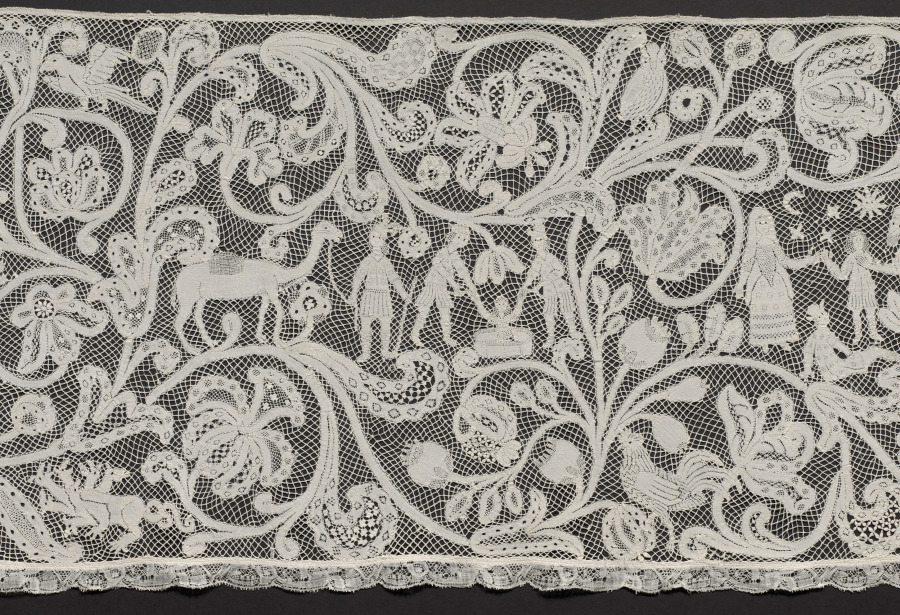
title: Lace Flounce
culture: Italy, Milan(?)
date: 1750–99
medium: Linen: bobbin lace (Punto di Milano)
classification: Lace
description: Being the most prestigious material, lace was used extensively by the 1600s for altar linen and for trimming priest’s albs, often incorporating finely rendered religious images amid blossoming vines. This alb flounce depicts scenes from the Old Testament story of Joseph, whose jealous brothers sold him to a caravan bound for Egypt. Joseph later interpreted dreams of the pharaoh, who made him ruler. When famine in Canaan caused Joseph’s ten brothers to travel to Egypt in search of food, they bowed down to him. After he revealed his identity, he forgave his brothers and God saved the family.